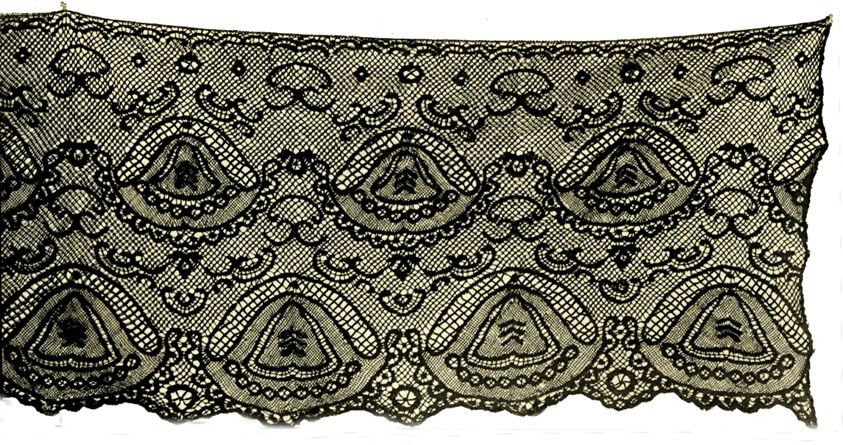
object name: Textile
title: Flounce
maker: France, Le Puy or Spain, Barcelona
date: 1875/1900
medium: Silk, bobbin straight lace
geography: France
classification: textile; lace - bobbin; lace